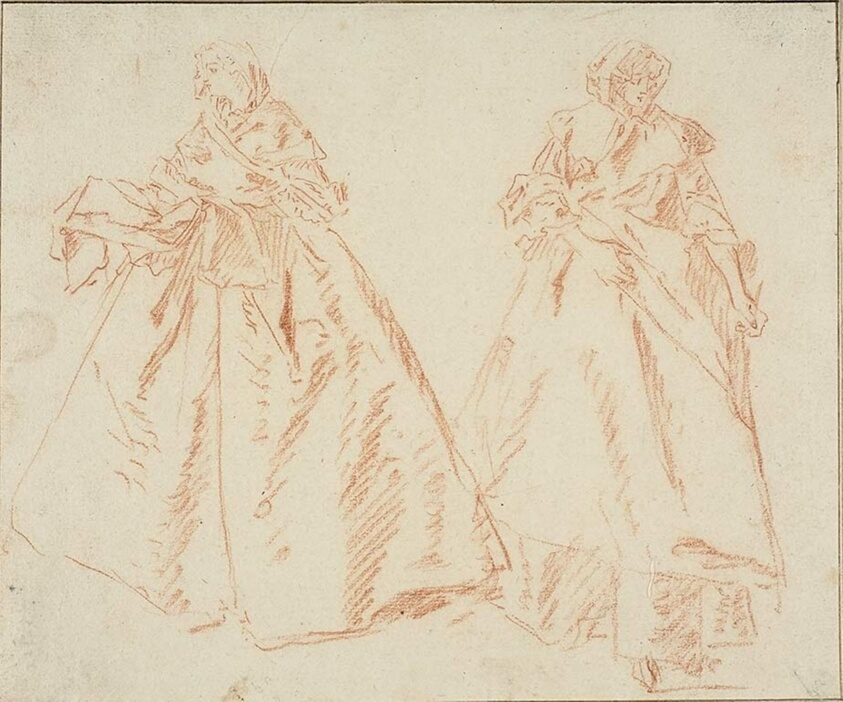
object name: Drawing and Watercolor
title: Two Standing Women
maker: Nicolas Lancret (French, 1690-1743)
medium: Red chalk on ivory laid paper, tipped onto card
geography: France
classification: chalk; drawings (visual works); prints and drawing